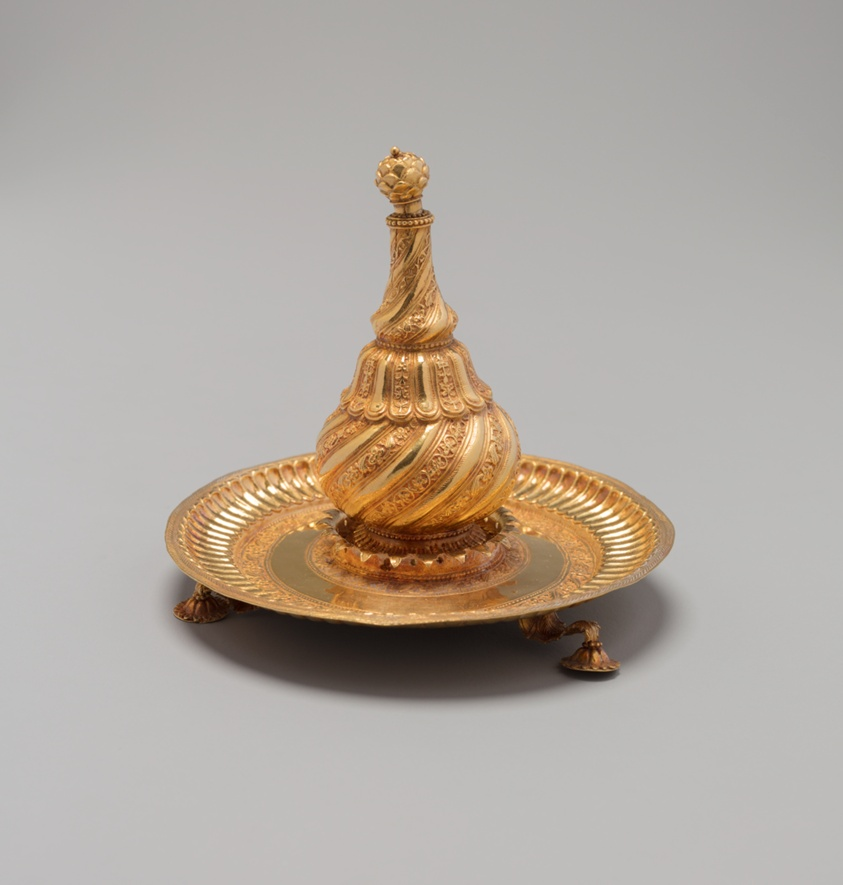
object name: Decorative Arts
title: Perfume Bottle (Attardan) and Tray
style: South Asian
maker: India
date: 18th/19th century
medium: Gold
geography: India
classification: metal; metalwork; asian art; decorative arts